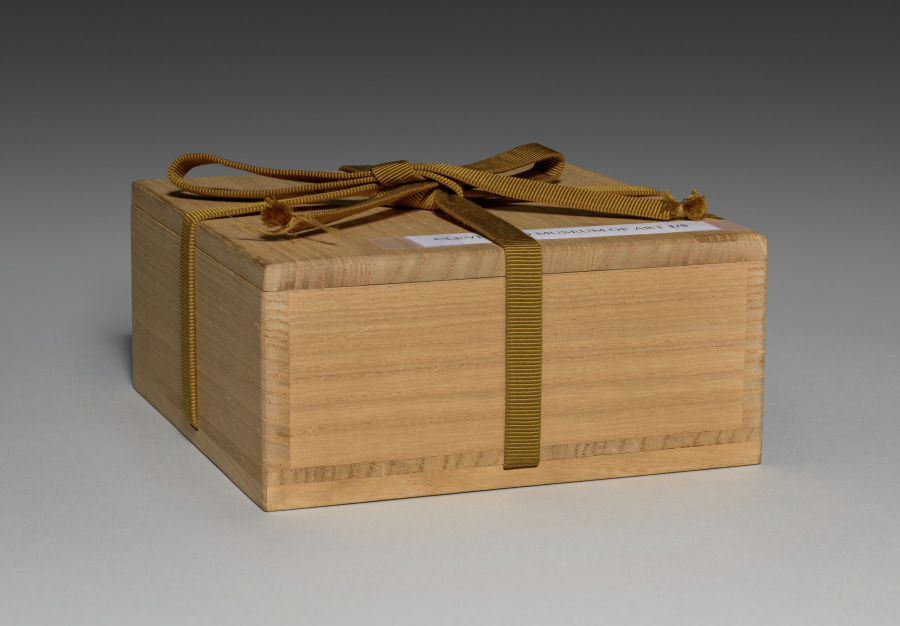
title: Small Dish (Kozara) with Hemp-Leaf Pattern and Bellflower Rim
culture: Japan, Edo period (1615–1868)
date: c. 1670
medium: Porcelain with underglaze blue and color enamel (Hizen ware, Nabeshima type)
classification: Ceramic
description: This dish combines underglaze blue decoration with overglaze color enamels. In between is a transparent glaze.